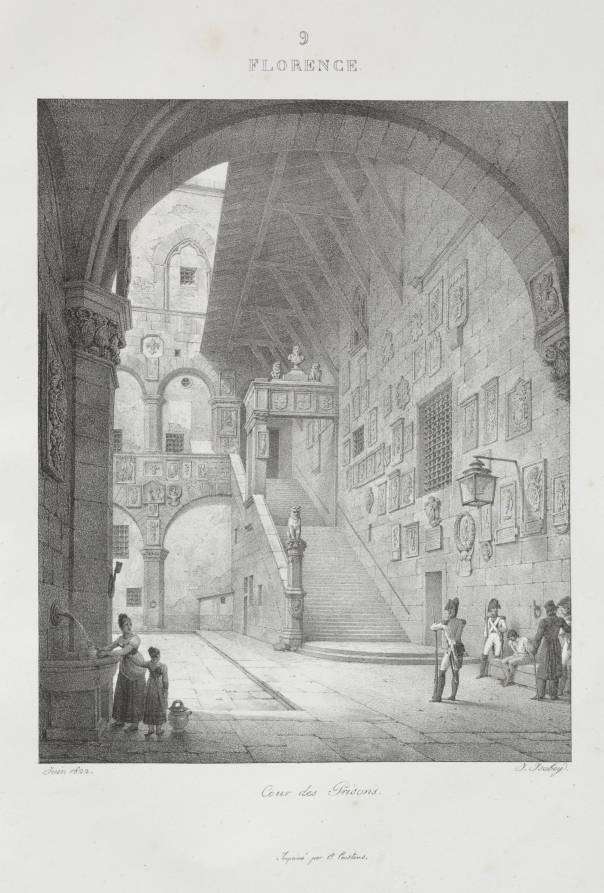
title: Voyage en Italie en 1822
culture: France, 19th century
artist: Jean-Baptiste Isabey (French, 1767–1855)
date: 1833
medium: lithograph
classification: Bound Volume